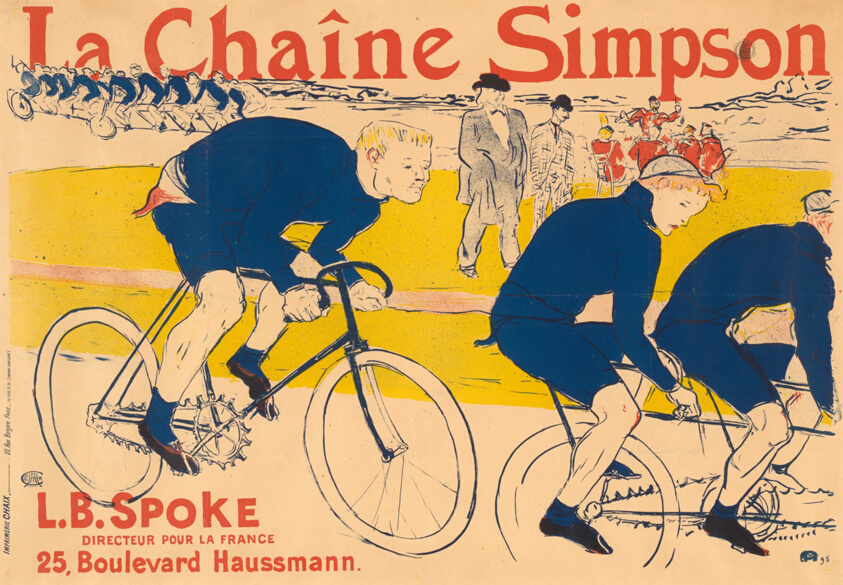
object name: Print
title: The Simpson Chain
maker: Henri de Toulouse-Lautrec (French, 1864-1901)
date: 1896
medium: Color brush and spatter lithograph (poster) on tan wove paper with lettering by another hand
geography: France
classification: print; lithograph; prints and drawing